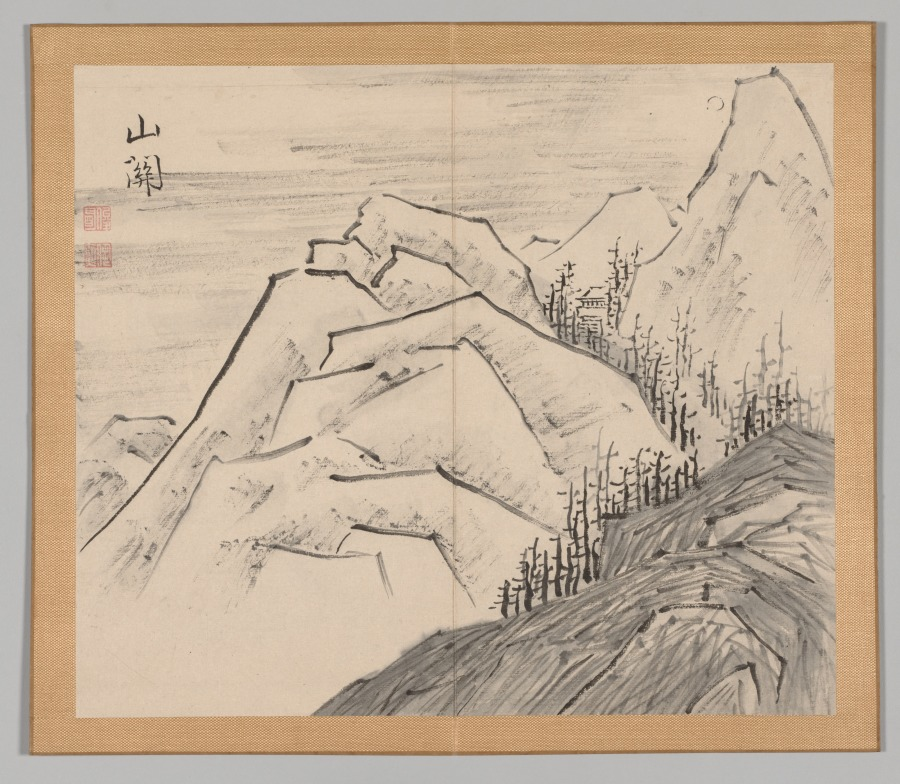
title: Reverberations of Taiga, Volume 1 (leaf 29)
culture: Japan, Edo period (1615–1868)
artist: Aoki Shukuya (Japanese, d. 1802)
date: mid- to late 1700s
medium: double-leaf from a pair of albums; ink and light color on paper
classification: Portfolio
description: Traditionally, young painters in Japan began their studies with an established master-painter. The master's compositions invariably became models that the apprentice copied to learn various ink and brush techniques. Shukuya was a pupil of the famous Kyoto artist Ikeno Taiga, whose style is reflected in these sketches of rocks, trees, and mountains.